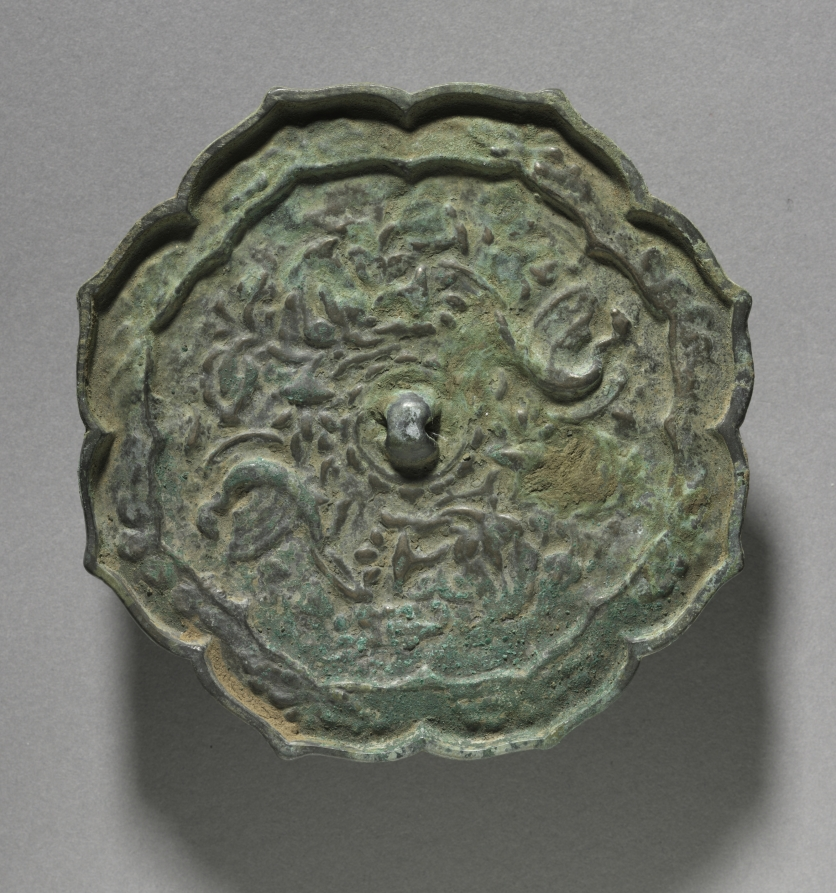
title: Eight-foiled Mirror with Flower and Phoenix Design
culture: Korea, Goryeo dynasty (918–1392)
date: 1100s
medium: bronze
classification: Metalwork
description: From ancient times, a mirror assumed various roles; a ritualistic tool, a diplomatic gift, and a luxury commodity. During the Goryeo dynasty (918-1392), which saw the great advancement of metallurgy, the royal court was the center of distributing sophisticated bronze artifacts. According to historical records, on the 7th day of the Lunar New Year, the king bestowed a bronze mirror inscribed with auspicious symbols upon each court official as part of a ceremony to celebrate the Day of Humans. This explains why a large quantity of bronze mirrors were excavated from elite tombs.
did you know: Due to its origin as an important tool in religion and politics, mirrors are often mentioned in many Korean proverbs that warn certain behaviors.